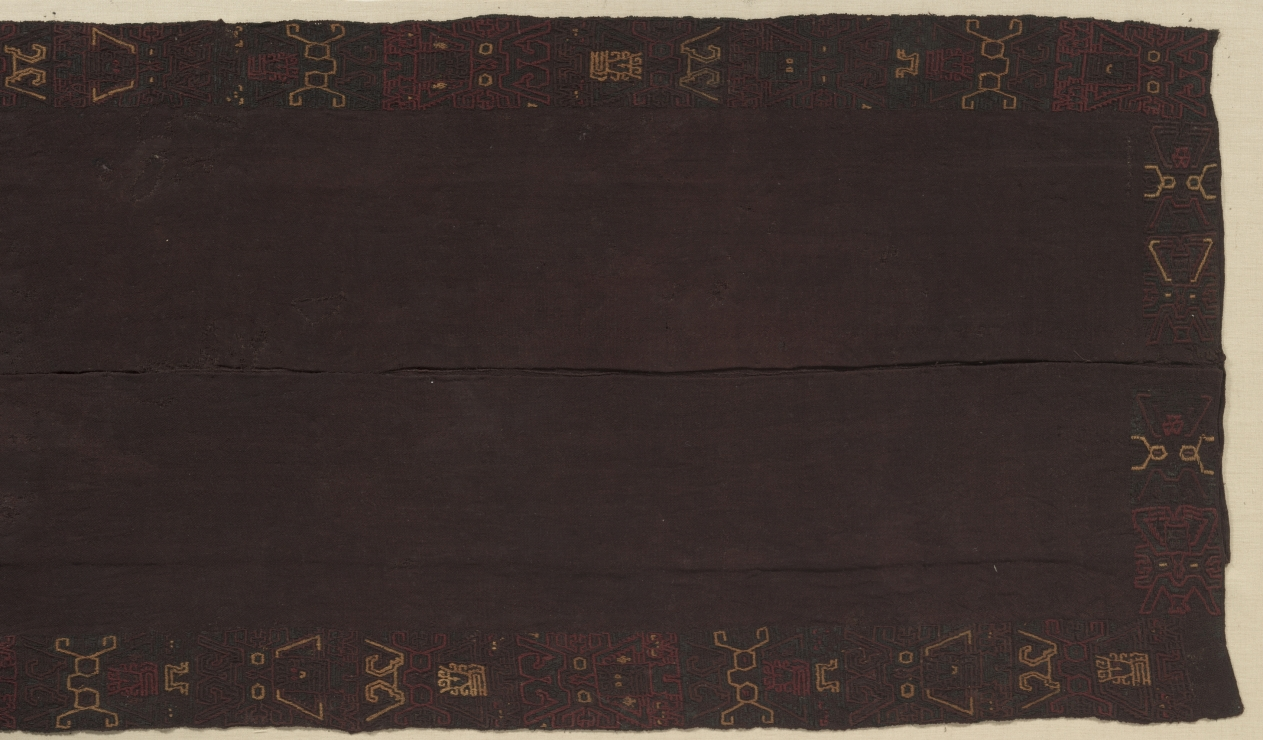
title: Mantle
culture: Peru, South Coast, Paracas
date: c. 600–400 BCE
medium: embroidery on wool ground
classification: Textile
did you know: Extremely dry conditions on Peru's desert coast allow for the extraordinary preservation of textiles.